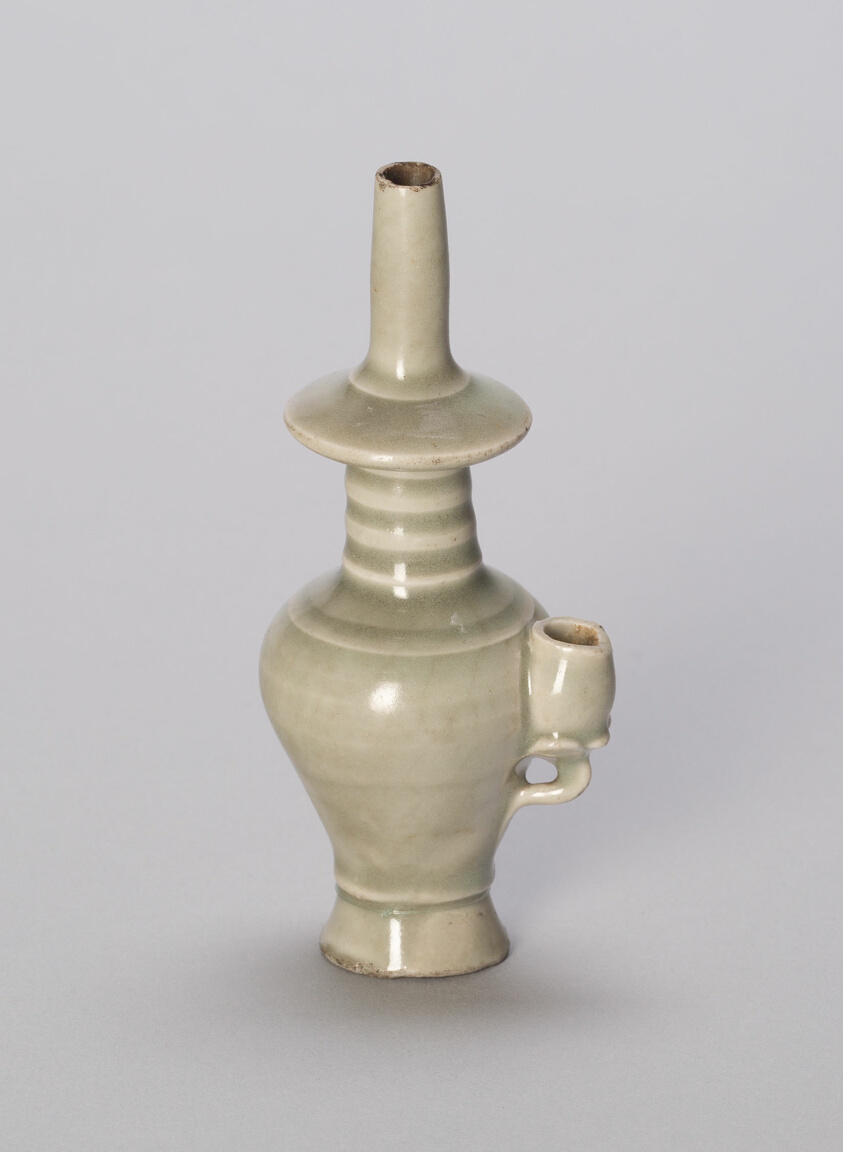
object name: Vessel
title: Miniature Buddhist Water Sprinkler (Kundika) with Lotus-leaf Spout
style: Chinese (culture or style)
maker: China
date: late Song (960–1279) or Yuan dynasty (1271–1368), c. 13th century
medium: Glazed stoneware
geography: China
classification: ceramics; vessel